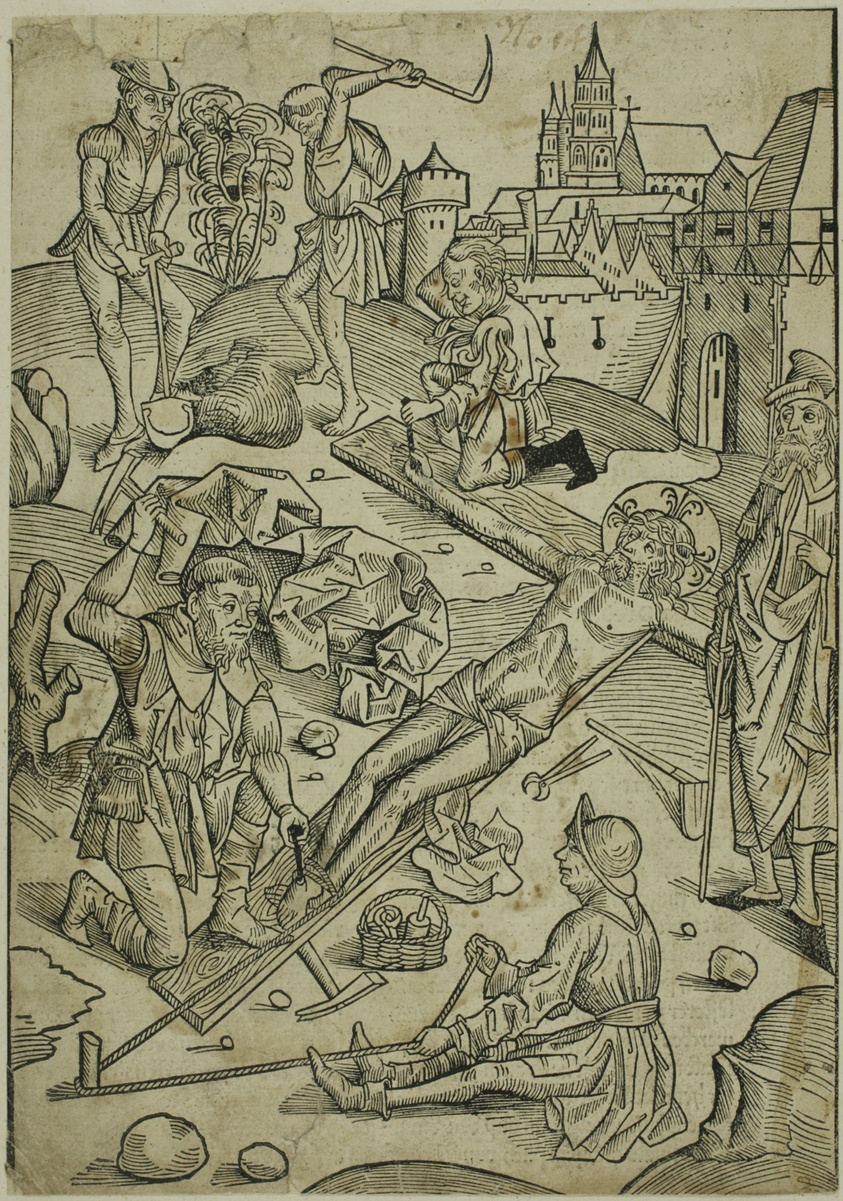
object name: Print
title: Christ Nailed to the Cross, page 85 from the Treasury (Schatzbehalter)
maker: Michael Wolgemut and Workshop (German, 1434/37–1519); published by Anton Koberger (German, 1440–1513)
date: 1491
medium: Woodcut on cream laid paper with letterpress on verso, laid down on ivory wove album sheet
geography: Germany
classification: woodcut; print; prints and drawing